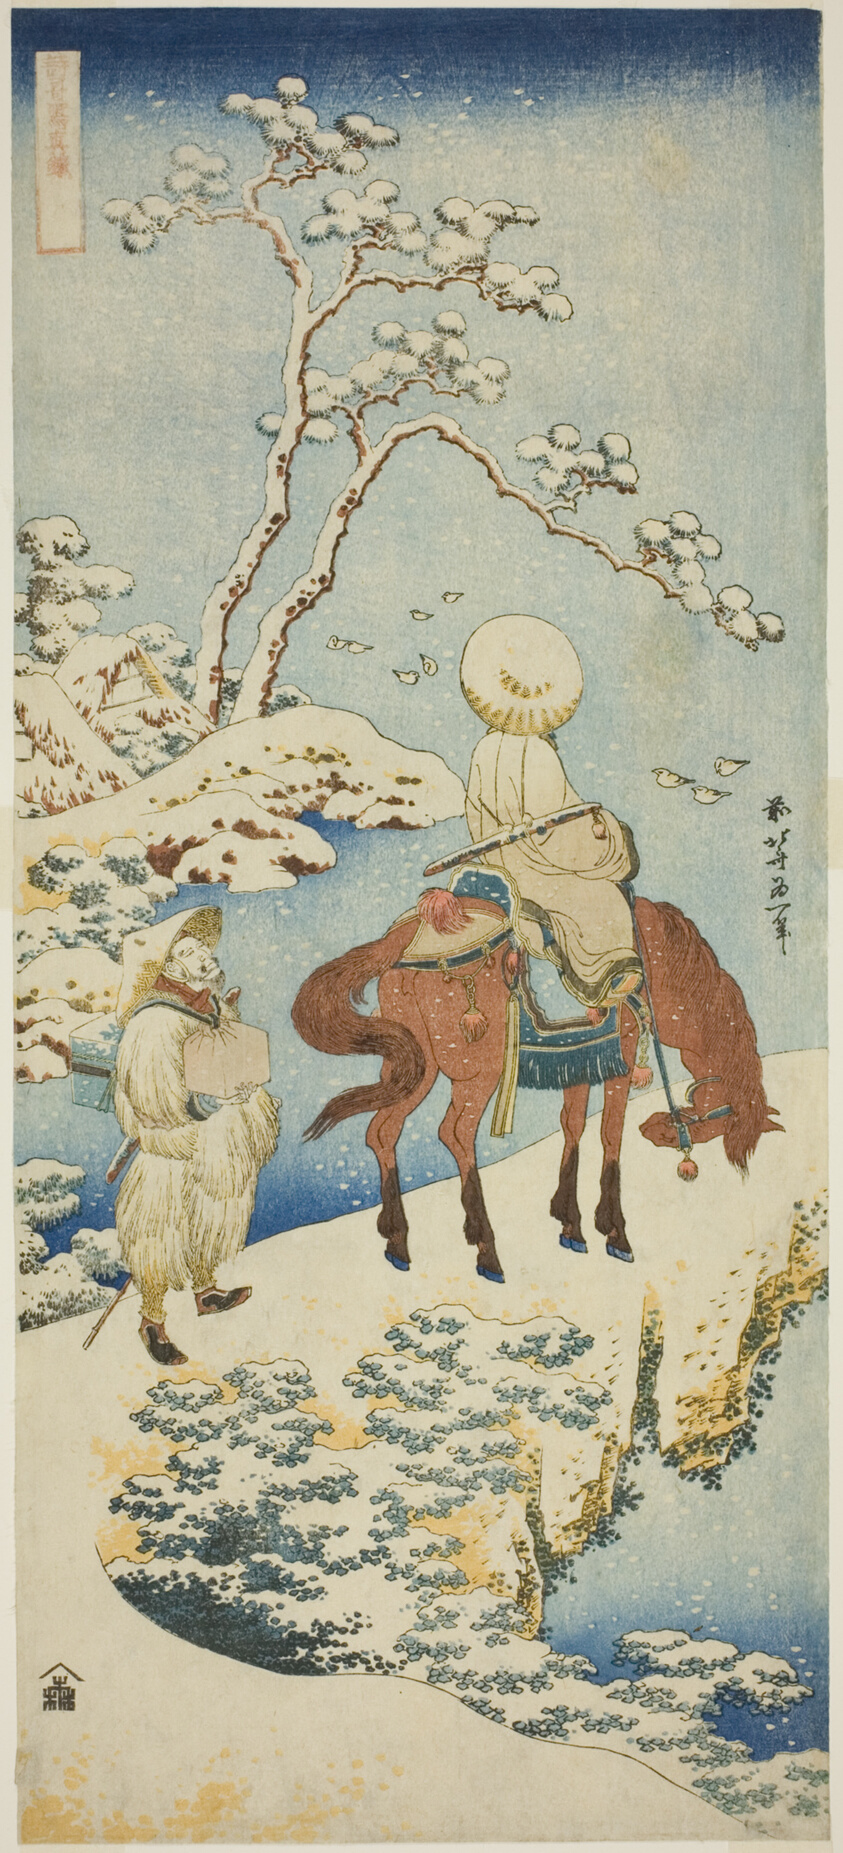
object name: Print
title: Horseman in Snow, from the series "A True Mirror of Japanese and Chinese Poems (Shiika shashin kyo)"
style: Japanese (culture or style)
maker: Katsushika Hokusai 葛飾 北斎; Japanese, 1760-1849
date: c. 1833/34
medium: Color woodblock print; vertical nagaban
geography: Japan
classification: woodblock print; print; asian art